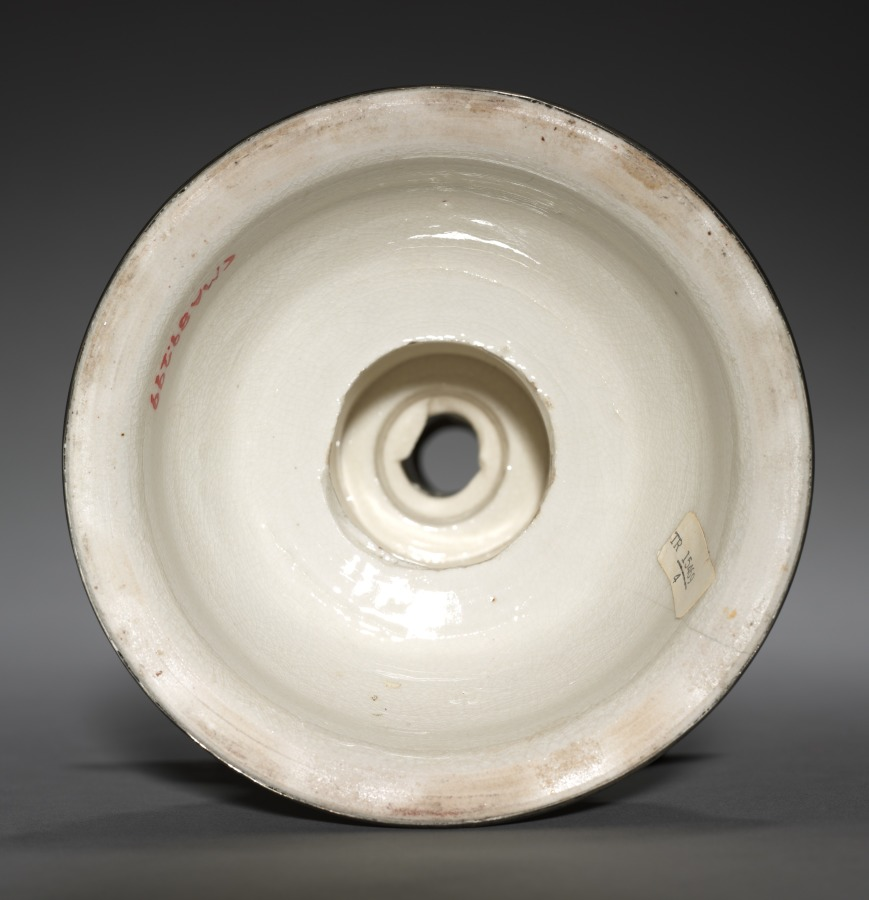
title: Candlestick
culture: China, Ming dynasty (1368–1644)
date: 1600s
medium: glazed porcelain with metal rims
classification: Ceramic